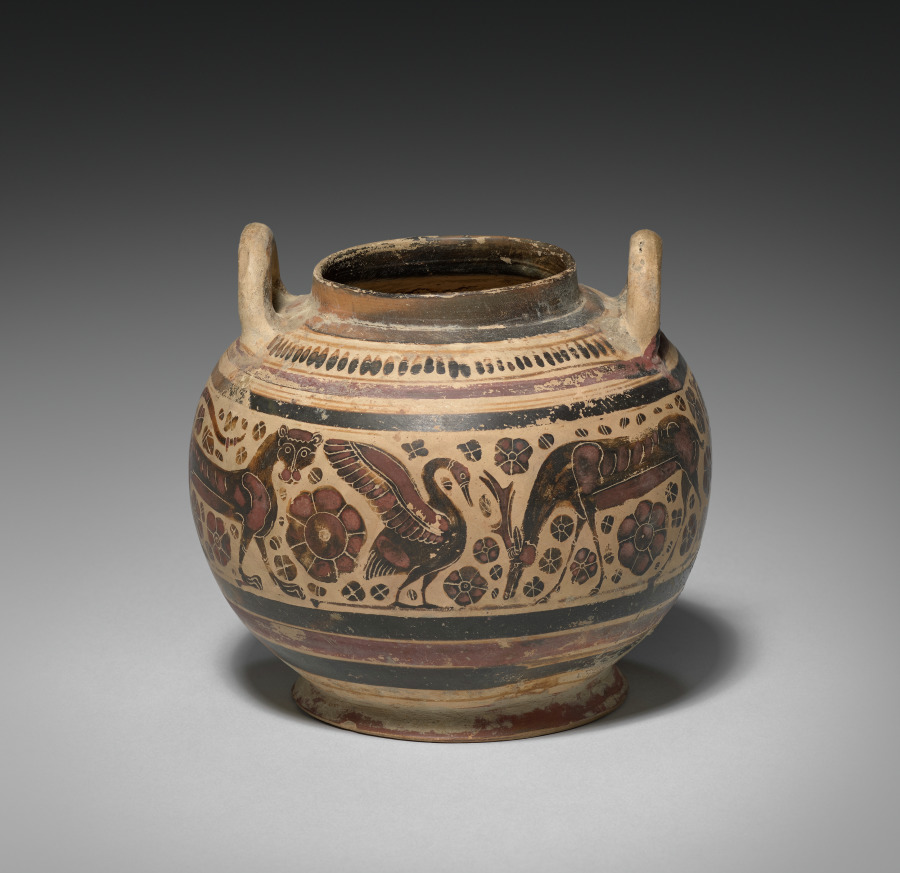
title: Corinthian Vase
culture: Greece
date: 600s BCE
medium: earthenware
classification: Ceramic